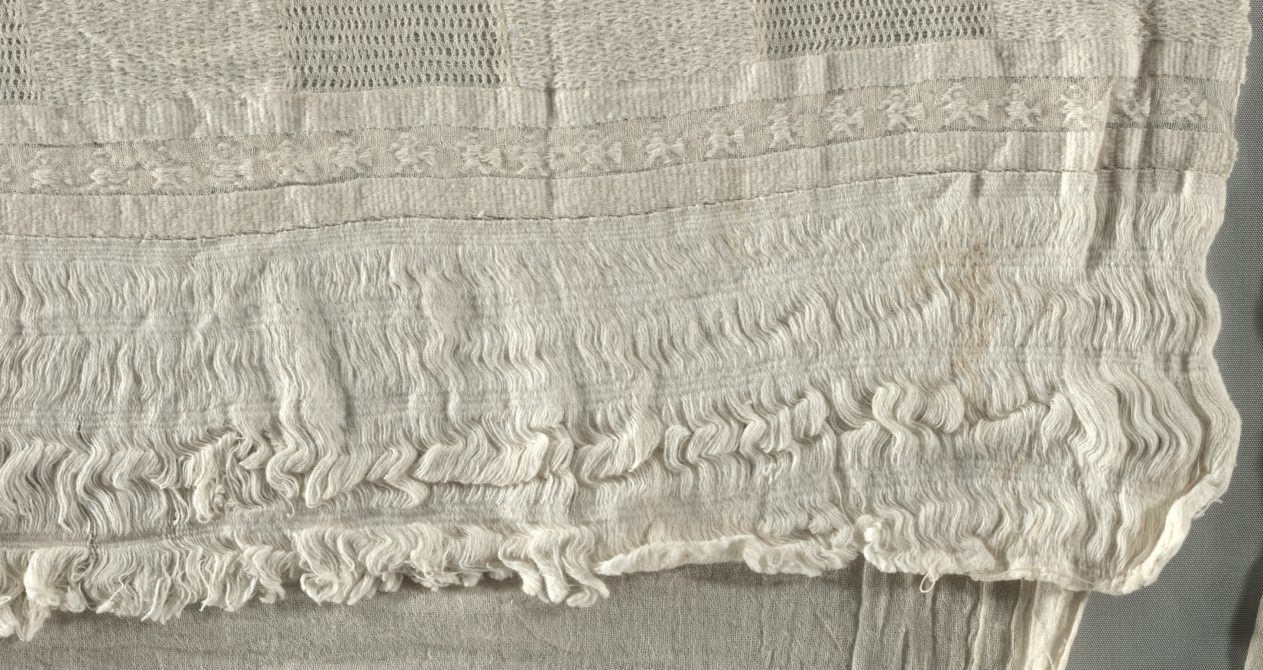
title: Loincloth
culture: Peru, North Coast, Chimú style, 1200–1460s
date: 1425–1500 (radiocarbon date, 92.3% probability)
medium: cotton; plain weave, brocaded and complex alternating gauze with 5 shots of plain weave between gauze shots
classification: Garment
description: Loincloths were basic men’s wear in ancient Peru. But the extraordinary size of some examples—this one is about eight feet long, unfolded—makes it difficult to know how they were worn, except that they were tied around the waist with the decorated panels hanging at the front and back of the body. The appearance may have been that of a billowing skirt.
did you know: This loincloth is huge!